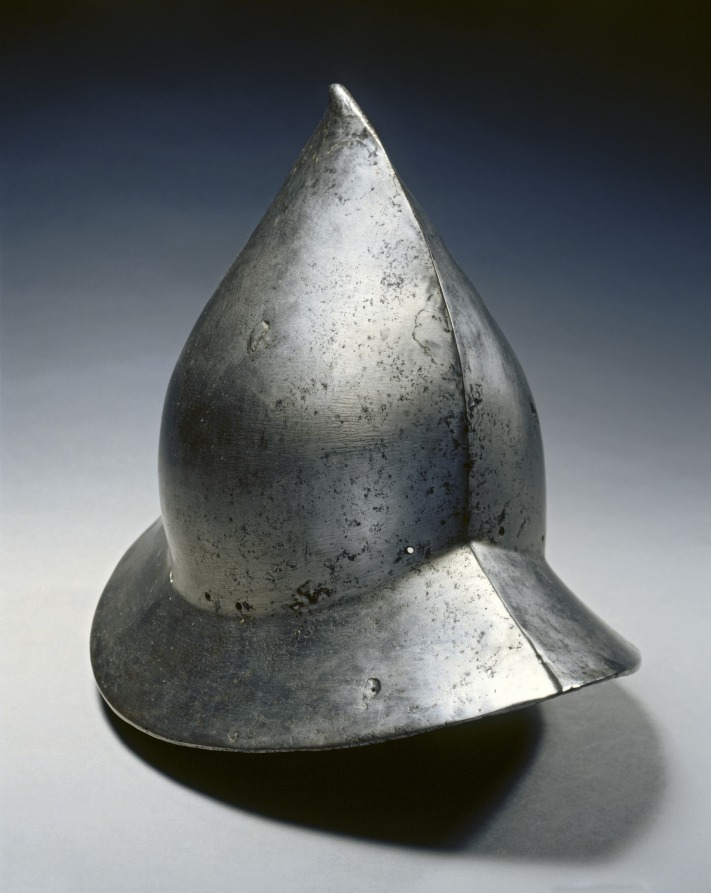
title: Cabacete (Helmet)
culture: Spain, late 15th century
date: c. 1480s–90s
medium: steel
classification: Arms and Armor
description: This tall open-face cabacete, alternately known as a "kettle hat" or "war hat" and ancestor of the later morion popular during the 1500s, would have been worn by an infantry soldier, not a mounted knight. The helmet has a conical point and a broad swooping brim, and its user may have worn a bevor, or separate chin piece, to protect his lower face and throat. He may also have worn a brigandine, or canvas doublet lined with metal plates, to protect his torso. Infantry troops were generally armed with hafted weapons such as a bill or halberd.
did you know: This helmet intentionally mimics in steel the shape of a brimmed hat and is unique to Spain.